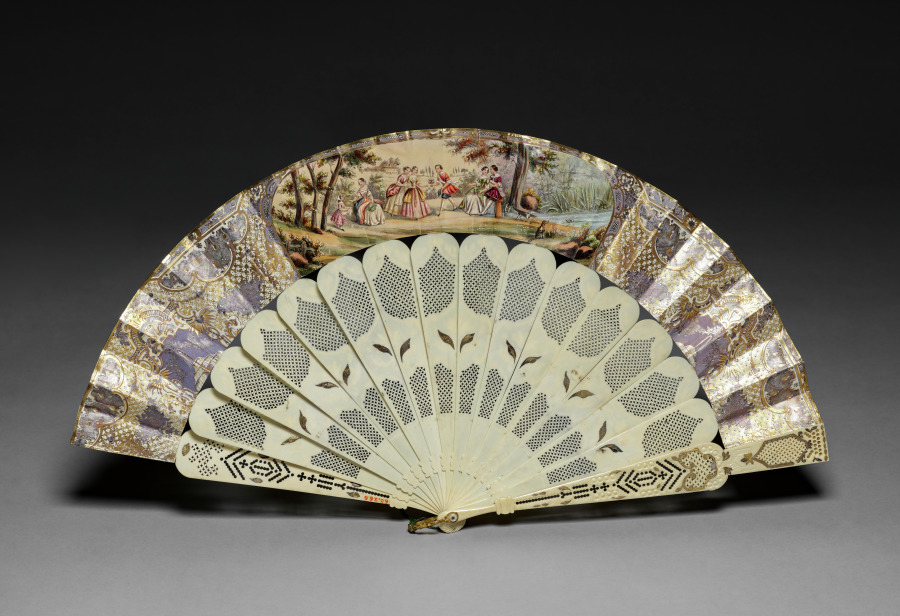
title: Fan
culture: Europe, mid-19th century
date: mid 1800s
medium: bone, paper, gold and silver leaf, paint, silk tassle with gold threads, mother-of-pearl washer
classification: Miscellaneous